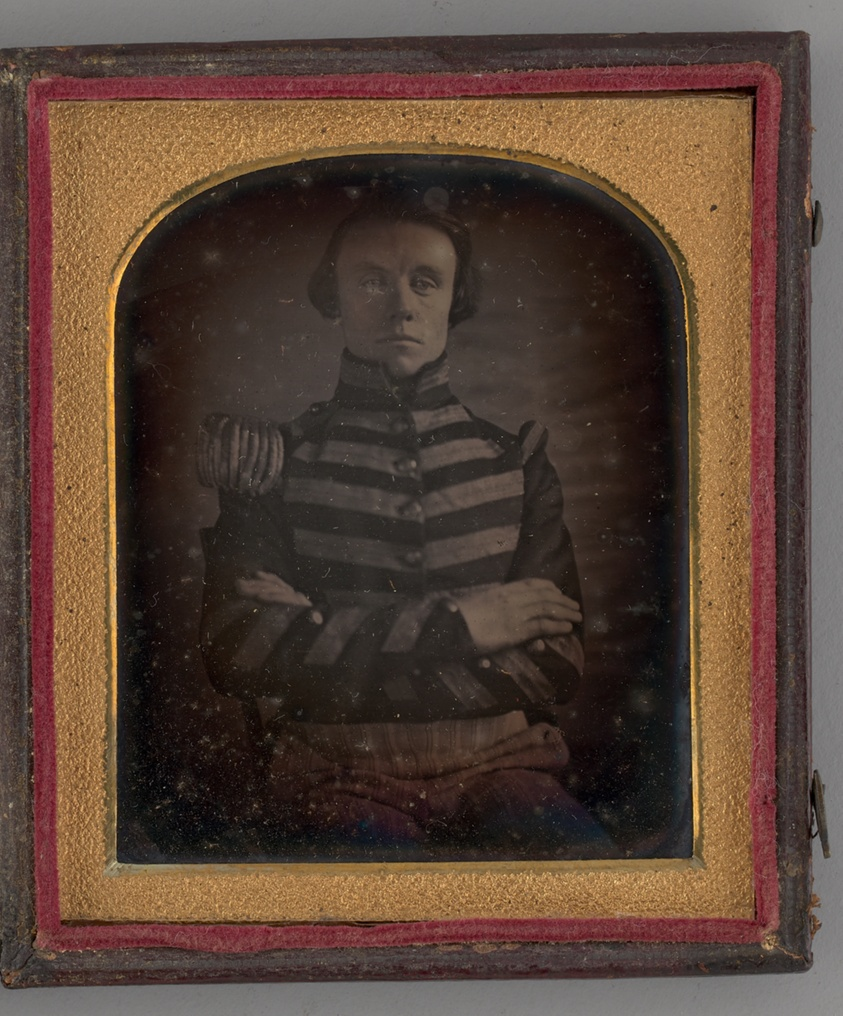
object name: Photograph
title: Untitled (Portrait of Seated Man with his Arms Crossed)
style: 19th century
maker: Unknown maker; American, 19th century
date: 1846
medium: Daguerreotype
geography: United States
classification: portrait; daguerreotype; portrait; photograph; photographic process; photography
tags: lundberg collection, Male, photography, portrait, portraits, portraits: male subject